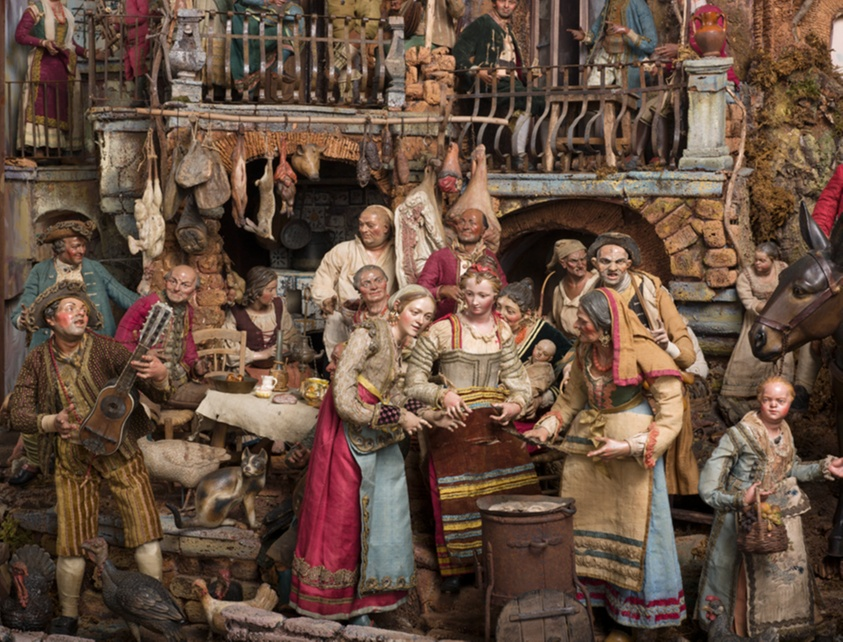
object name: Installation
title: Crèche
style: 18th Century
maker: Neapolitan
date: 1725–75, with later additions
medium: Mixed media including cloth, cork, gouache, metal, moss, papier-mâché, polychrome, terracotta, straw, watercolor, wax, and wood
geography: Naples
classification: mixed media; european painting; installation; figure; textile; furniture; painting; paint; Italian; sculpture/wood; sculpture; wood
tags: crèches, Jesus, Christmas, nativity scenes, religious scenes, angels, animals, architectural fragments, babies, cats, cherubs, Chicken, child, children, classical, dog, donkeys, fathers, flowers, food, hats, holy family, horse, horses, instruments, kings, labor, men, monkeys, mother, music, musical instruments, plates, putti, religion, religious, religious figures, royal, ruins, saints, sculpture, sheep, sons, travel, Virgin and child/Madonna and child, woman, women, work